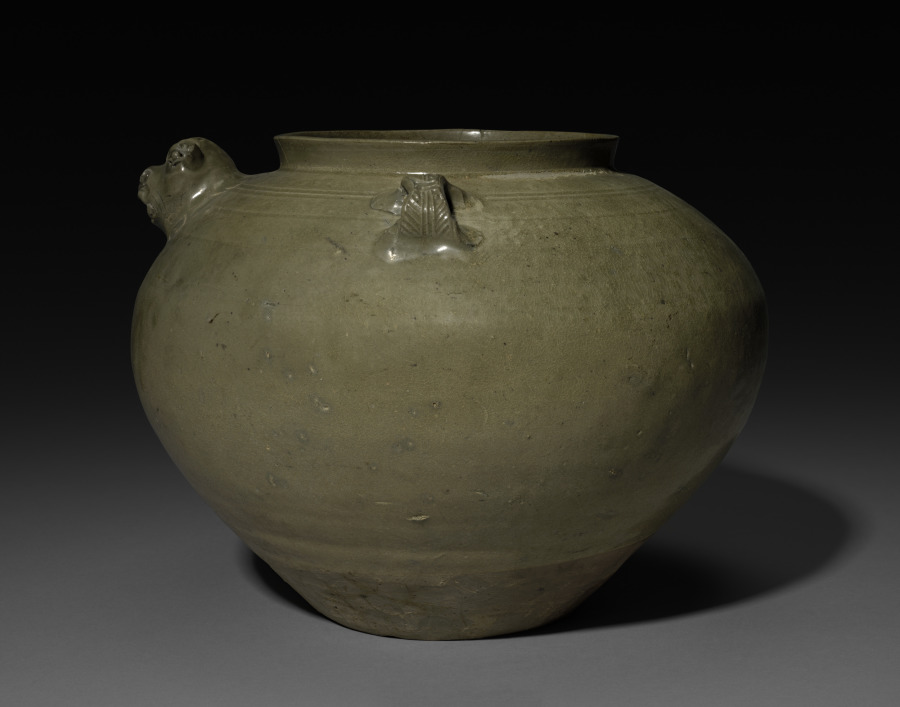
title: Jar with Tiger-Headed Spout: Yue Ware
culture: China, Western Jin dynasty (265-316 CE)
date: late 200s–late 300s CE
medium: glazed stoneware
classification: Ceramic